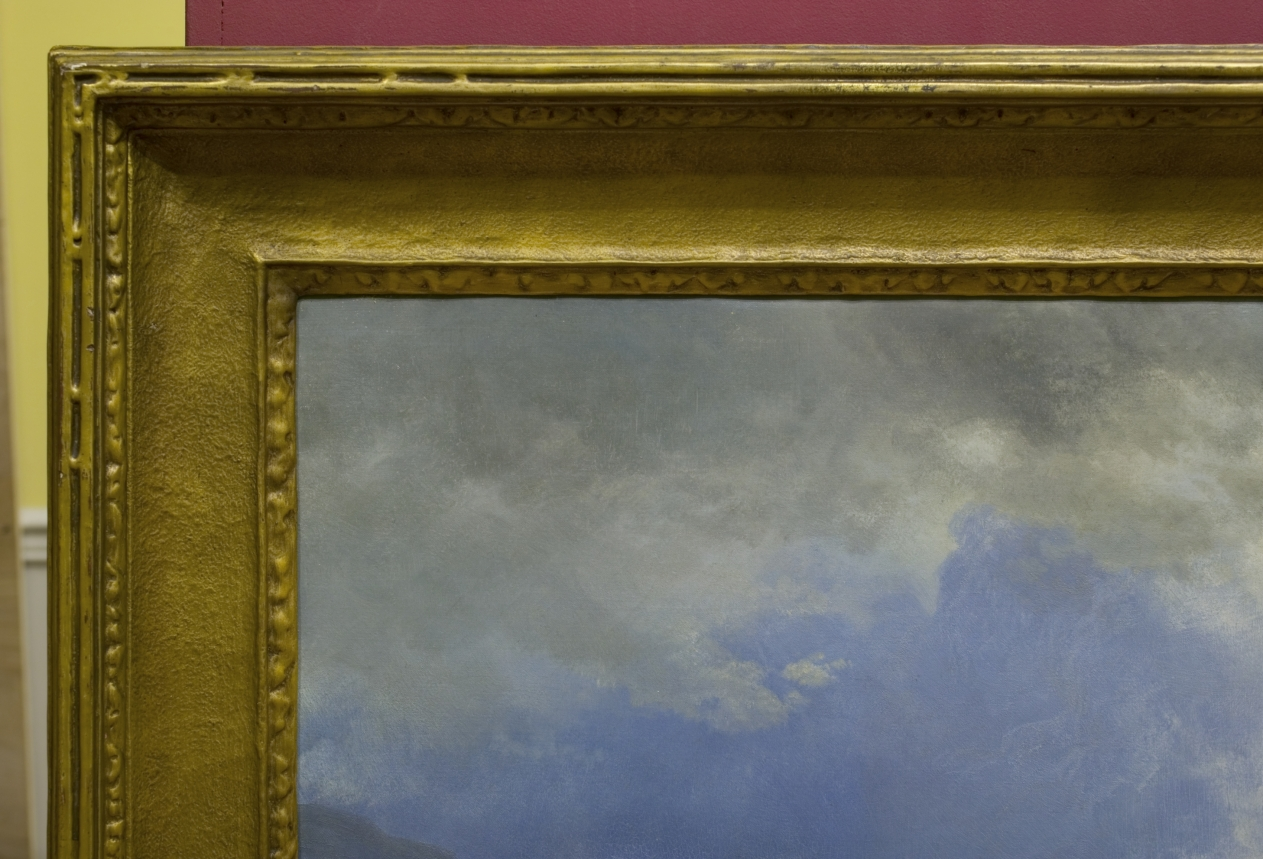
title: Mount Starr King, Yosemite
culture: America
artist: Albert Bierstadt (American, born Prussia [now Germany], 1830–1902)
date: 1866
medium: oil on canvas on panel-back stretcher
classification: Painting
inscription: signed lower right: ABierstadt. / 66 [AB in monogram]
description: During the summer of 1863, Bierstadt visited Yosemite Valley in California and made numerous sketches. Back in his New York studio, he used them to produce many majestic paintings, including this view of the distant granite peak Mount Starr King. Such scenes thrilled East Coast audiences and helped encourage early movements to safeguard natural wonders. In 1864, President Lincoln signed a bill preserving Yosemite as public property; it became a national park in 1890. Bierstadt included two Native Americans with a packhorse in his composition, and their presence references the fact that Indigenous peoples had inhabited or seasonally visited the region for millennia. Over time, various government and military agencies dispossessed them of these ancestral lands. Although no longer residents in the national park, descendants of the seven Indigenous nations with ties to Yosemite persevered to live in neighboring areas.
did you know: Highly successful, Bierstadt built a mansion and named it Malkasten, a German word meaning “paintbox.”